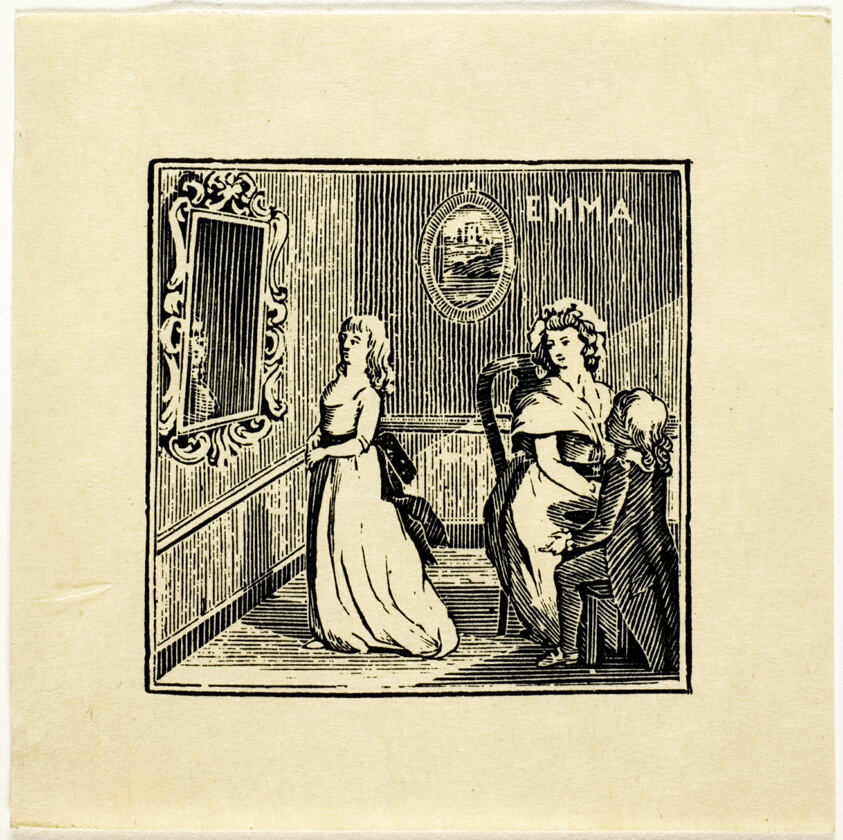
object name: Print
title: Book Illustration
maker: Thomas Bewick (English, 1753-1828)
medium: Wood engraving on paper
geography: England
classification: wood engraving; print; prints and drawing